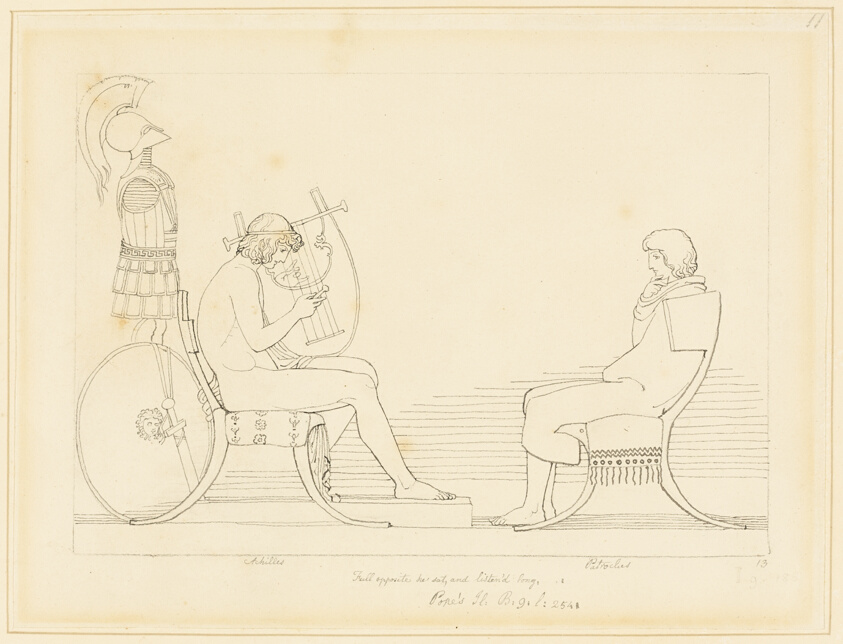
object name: Drawing and Watercolor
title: Achilles and Patroclus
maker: John Flaxman, II; English, 1755-1826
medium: Pen and black ink, over traces of graphite, on cream wove paper, laid down on cream wove paper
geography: England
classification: pen and ink drawings; drawings (visual works); prints and drawing